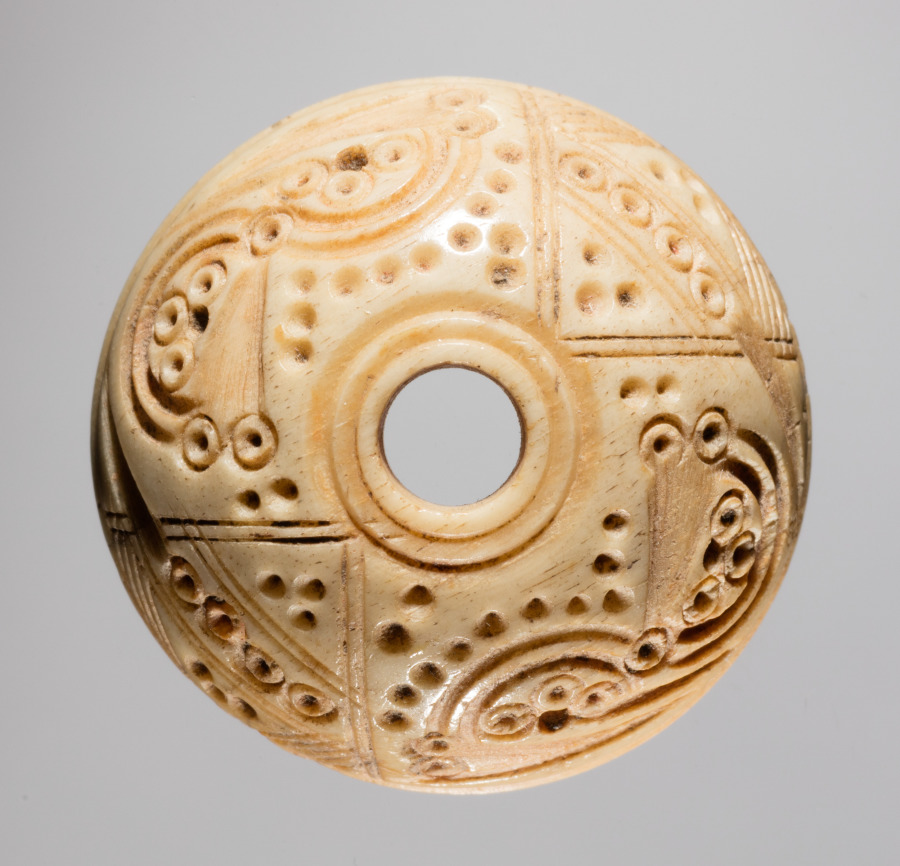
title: Spindle Whorl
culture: Iran, early Islamic period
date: 700s - 900s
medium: bone, incised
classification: Spindle Whorl